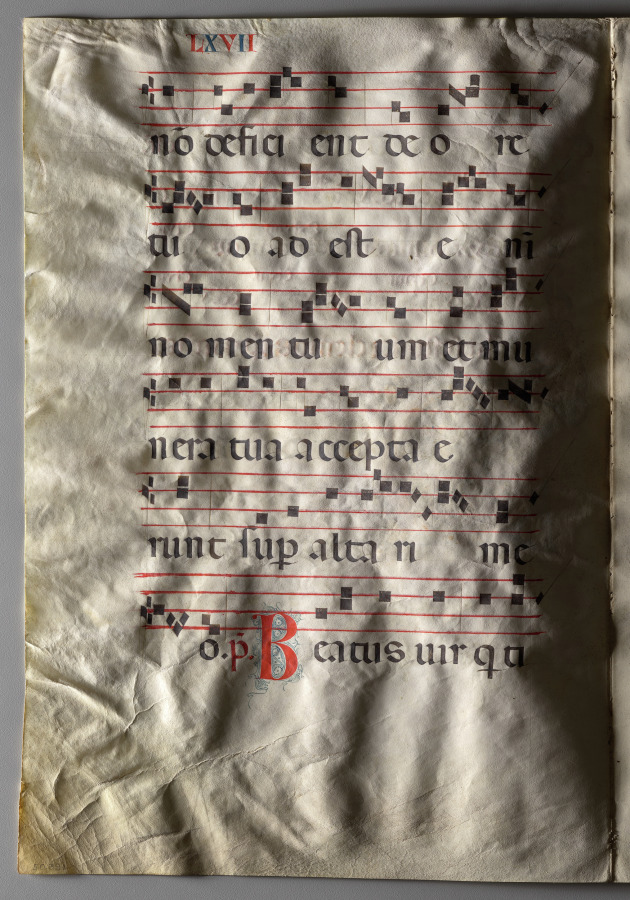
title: Bifolio from a Gradual: Music and Text (verso)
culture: Italy, Siena(?)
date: c. 1300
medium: Ink, tempera, and gold on vellum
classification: Manuscript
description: The large decorated initial G introduces the text, Gaudeamus omnes in Domino (Let us rejoice in the Lord). It is the beginning of the opening prayer, or introit, of the Mass for the Feast of All Saints (November 1). The figures within the initial include Christ, the Virgin Mary, and various saints.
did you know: Words written in red ink, called rubrics, indicate titles and chapter headings that are not part of a manuscript’s main text.